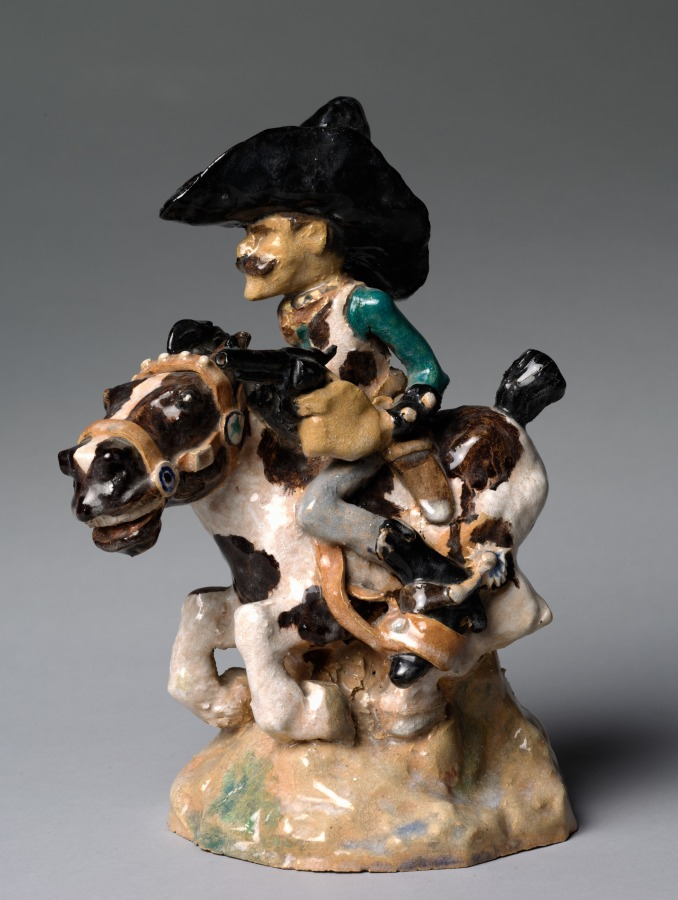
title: Sheriff of Pecos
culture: America, Ohio, Cleveland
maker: Russell Barnett Aitken (American, 1910–2002)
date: 1931–32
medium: ceramic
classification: Ceramic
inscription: Signed on the base on the back side "Russell Aitken"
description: Figural studies were emphasized in ceramics classes at the Kunstgewerbeschule, where Clevelanders Viktor Schreckengost and Russell Barnett Aitken studied in 1929–30. Aitken absorbed the Viennese style of exaggeration and caricature as seen in this depiction of a popular folk hero of the Wild West, incorporating such motifs into his work for the rest of his career.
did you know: Caricature, or the exaggeration of prominent features, was a hallmark of Russell Barnett Aitken's style of modeling figures.